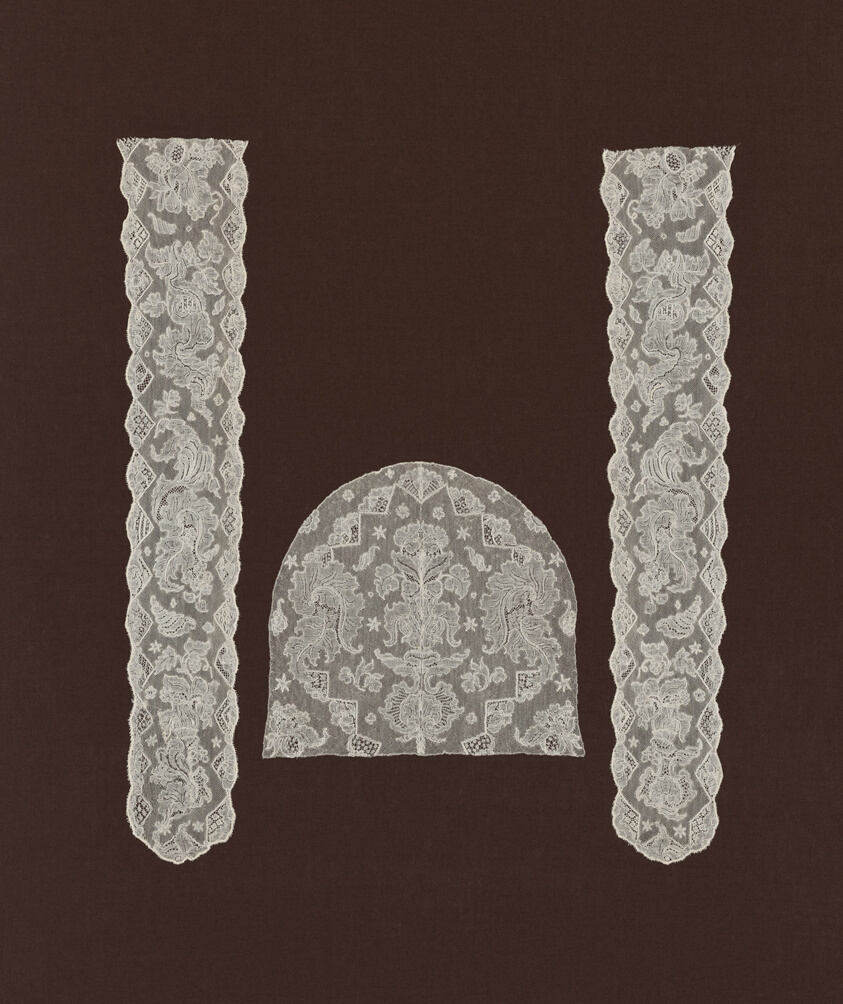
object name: Costume and Accessories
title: Lappet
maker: Belgium, Flanders, Mechlin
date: 1740s/50s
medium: Linen, bobbin straight lace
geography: Belgium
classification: costume accessory; lace - bobbin; lace; textile; costume; costume accessory - headdress; costume accessory worn above the waist